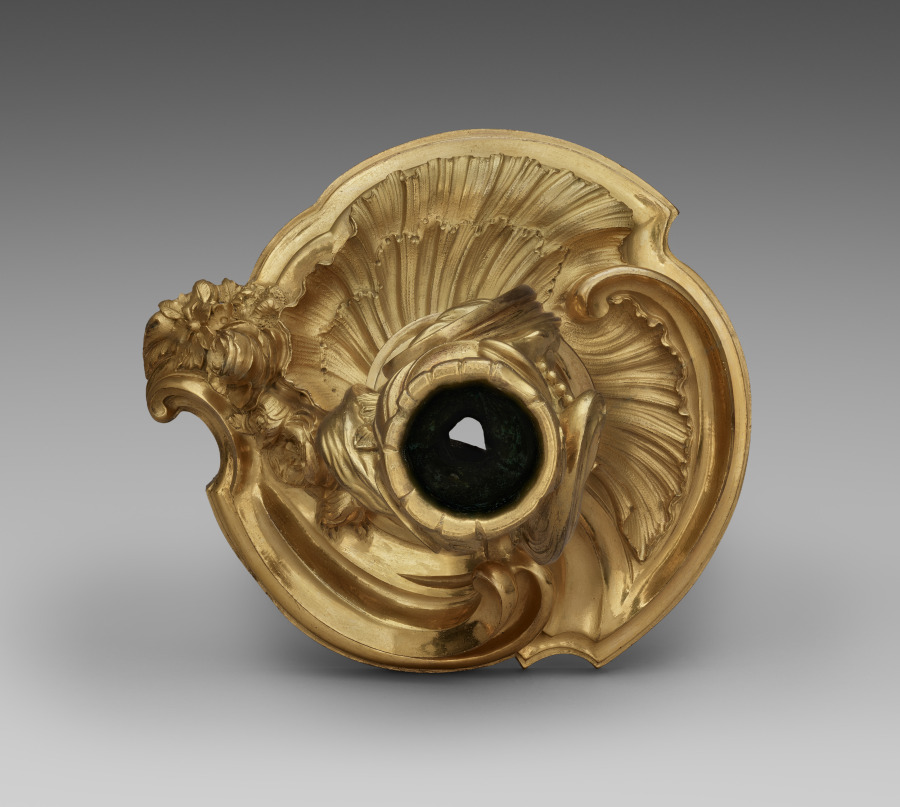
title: Candlestick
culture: France, 18th century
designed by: Juste-Aurèle Meissonnier (French, 1695–1750)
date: c. 1740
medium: gilt metal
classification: Furniture and woodwork